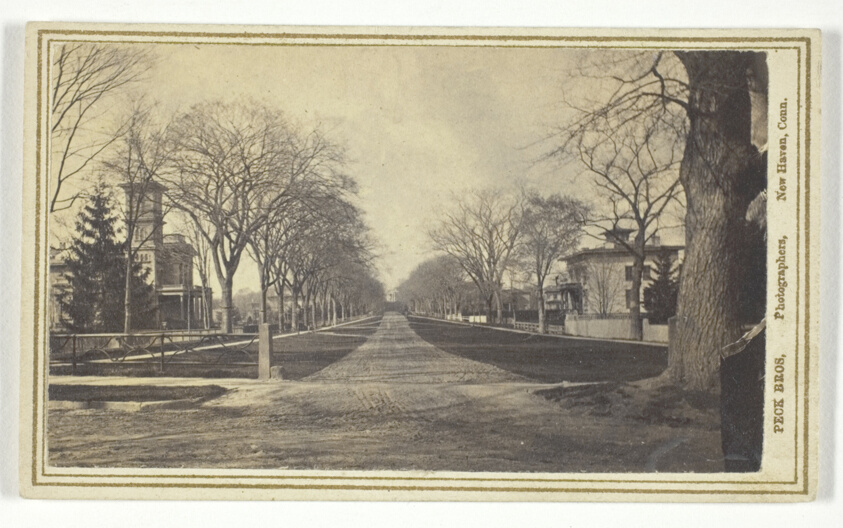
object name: Photograph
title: Hillhouse Avenue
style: 19th century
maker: Peck Brothers (American, 19th century)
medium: Albumen print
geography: United States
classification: photographic process; photography; card photographs; photograph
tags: Collected by Hugh Edwards